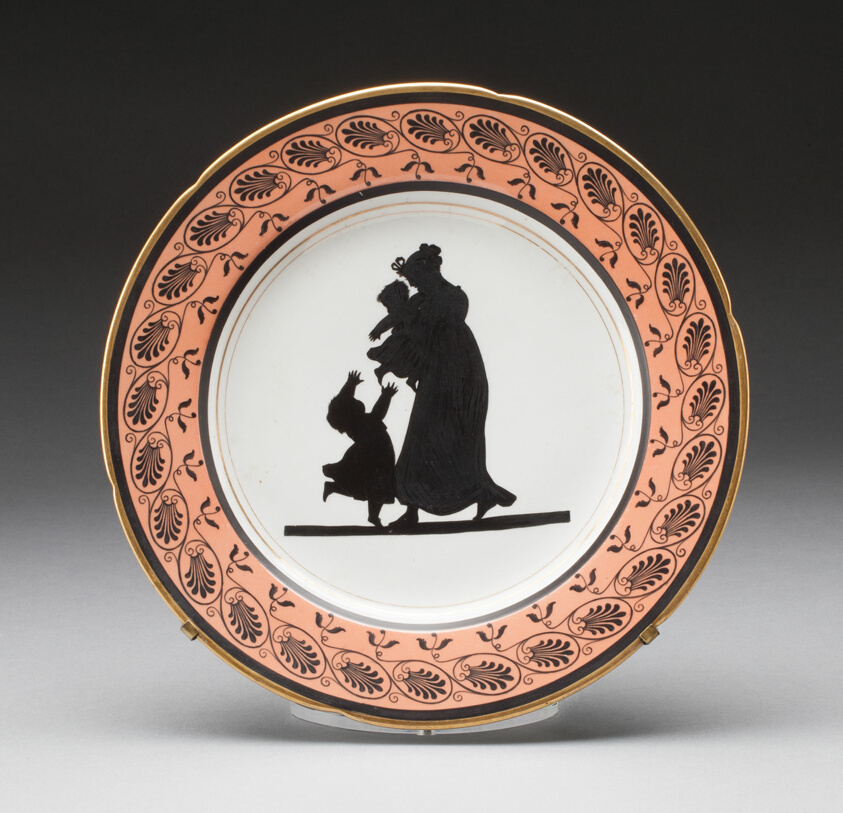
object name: Ceramics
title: Plate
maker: Coalport and Coalbrookdale Porcelain Factory; English, founded 1796; Painted by William Locke of Norbury; English, 1767-1847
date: c. 1805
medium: Soft-paste porcelain, orange and black enamels and gilding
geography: Coalport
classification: plate (general, dish); dish (vessel); porcelain; european decorative arts; ceramics